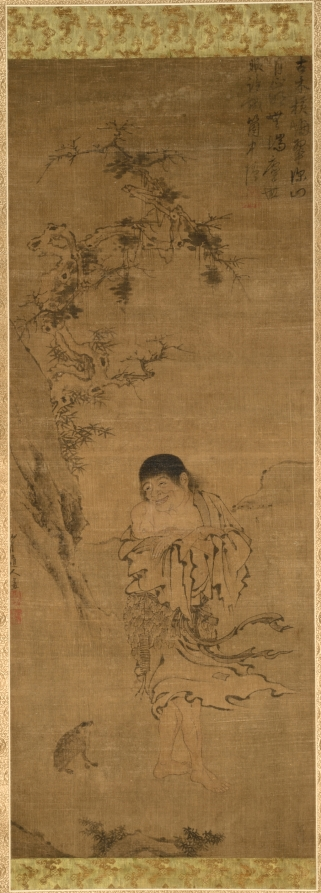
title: Liu Haichan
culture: China, Yuan dynasty (1271-1368)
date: 1300s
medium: Hanging scroll; ink and color on silk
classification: Painting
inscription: Inscribed in upper right corner: The old tree has its green shrouded in mist/ In the depth of the mountain the moon is bright/ By no means could the eyes of the dusty world/ Understand these particular feelings. Shan-yüeh tao-jen [seal] Shan-yüeh (?)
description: Liu Haichan is a Daoist immortal sometimes included in the Eight Immortals. He is often shown as a young man wearing bangs across his forehead. He was said to have lived during the Five Dynasties period (907–979) and left his position as a grand councilor to become a hermit. Usually depicted carrying a string of coins and accompanied by a three-legged toad, Liu Haichan became a god of wealth and his toad symbolizes wealth as well. In this scroll, Liu is teasing the three-legged toad with a string of coins tied to his waist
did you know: Because the immortal Liu Haichan is usually depicted with bangs, his eponym, liúhǎi 劉海, means "bangs" in Chinese.